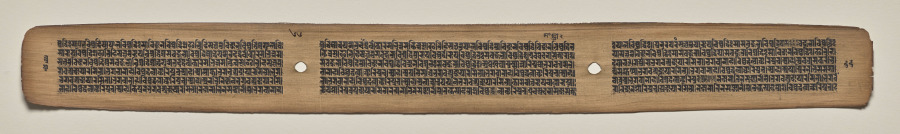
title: Text, Folio 66 (verso), from a Manuscript of the Perfection of Wisdom in Eight Thousand Lines (Ashtasahasrika Prajnaparamita-sutra)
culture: Eastern India, Bihar, Vikramashila Monastery. Painting: Nepal, Kathmandu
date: Sunday, September 14, 1119 (year 239 of the Newar Samvat in the month of Ashvina)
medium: gum tempera and ink on palm leaves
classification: Painting